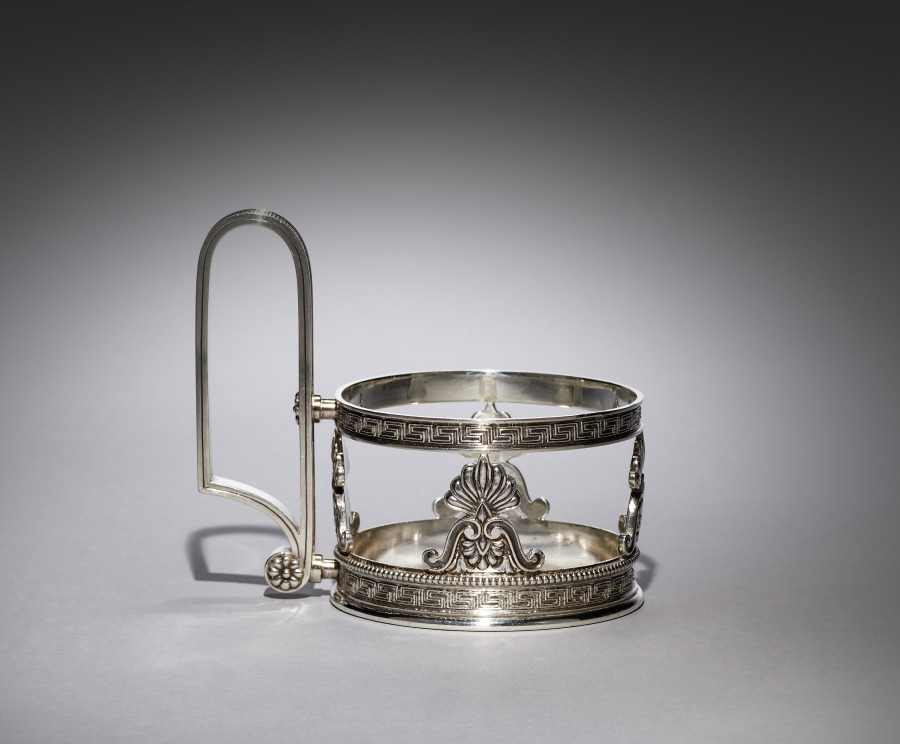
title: Tea Cup Holder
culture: Russian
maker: House of Fabergé (Russian, 1842–1918)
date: 1908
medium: silver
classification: Glass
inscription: Дорогому А. В. Вержбилович Признательный Митя Шагинъ 19 I/III 08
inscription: Profile of a woman (wearing a kokoshnik) facing left; greek letter delta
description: Fabergé drew upon different historical styles and applied them to the same object type with a consistently high level of finesse. This holder for a tea glass incorporates a range of classicizing ornamental designs from the turn of the nineteenth century, such as the Greek key pattern on the horizontal bands and the intermittent palmettes.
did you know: The history of the palmette, a motif resembling fan-shaped palm leaves, can be traced back to ancient Egypt.